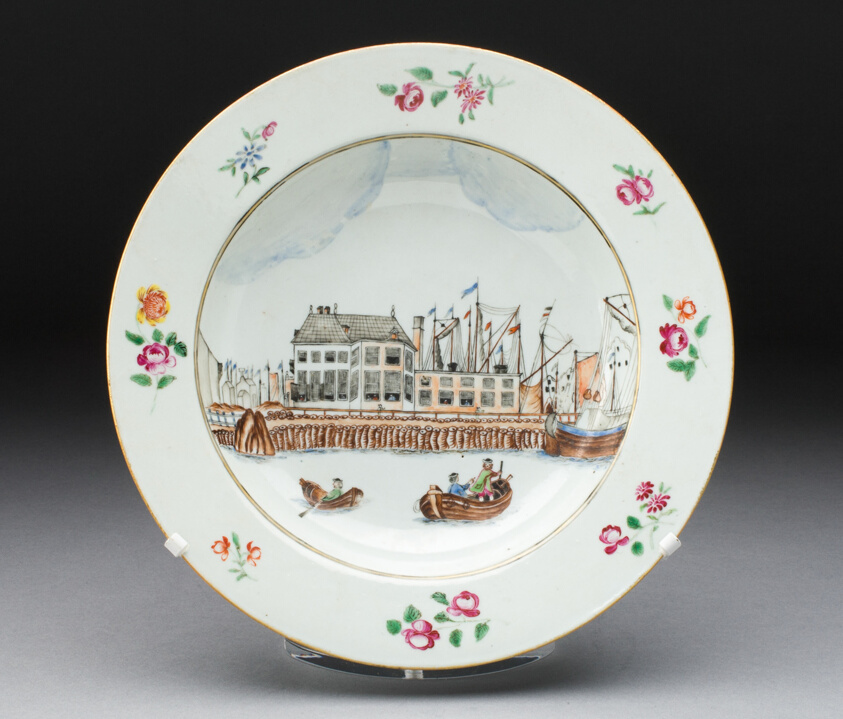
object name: Ceramics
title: Soup Bowl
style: chinese export, Chinese (culture or style), East Asian, asian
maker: China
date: c. 1750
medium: Hard-paste porcelain with polychrome enamels and gilding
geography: Jingdezhen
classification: bowl; dish (vessel); chinese export porcelain; porcelain; european decorative arts; ceramics